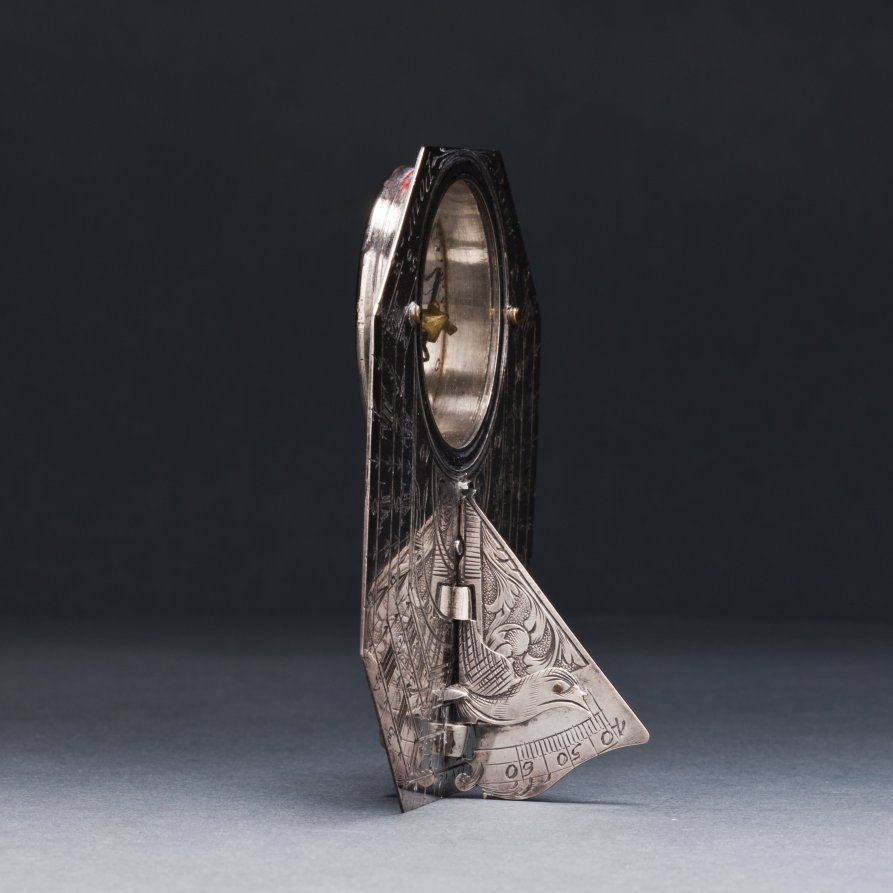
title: Butterfield Sundial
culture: France, 18th century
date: 1700s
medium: silver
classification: Silver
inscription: [Engraved signature above the compass in ribbon band]: "N. BION A Paris"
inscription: [Engraved on the face of the sundial]: “Pour 55° 4-5-6-7-8-9-10-11 50° IIII-V-VI-VII-VIII-IX-X-XI 45° 5-6-7-8-9-10-11 40° -VI-VII-VIII-IX-X-XI'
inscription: [Engraved on the other side]: "Pour 55° -8-7-6-5-4-3-2-1-0 50°-VIII-VII-VI-V-IIII-III-II-I 45°-8-7-6-5-4-3-2-1 40°-VII-VI-V-IIII-III-II-I"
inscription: [Engraved around the compass]: “NORD-OUEST-SUD-EST”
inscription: [Engraved on the back of the sundial]: “Turin 44 Milan 46 Paris 49 Lion 46 Metz 49 Rome 42 Liege 51 Naples 44 Namur 50 Gennes 44 Marseille 43 Grenoble 45 Bayonne 43 Bruxelle 51 Londres 52 Nantes 47 Vienne 48 Toulon 43 Tours 47 Lille 51”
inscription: [Engraved around the back of the compass]: “Venise 45 Strasbourg 49 Amsterdam 52 Hambourg 54 Varsovie 52 La Rochelle 46”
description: Butterfield-type sundials are characterized by their adjustable gnomons, metal flaps that cast a shadow on the dial’s face to indicate the hour, and geographical indices. This sundial has a scale adjustable between latitudes of 40° to 60° north. The latitudes of 26 European towns are engraved on its back for quick reference. With an intricately engraved silver face, it would have functioned as a fashionable traveler’s accessory.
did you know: Butterfield-style sundials were named after Micheal Butterfield, an English scientific and mathematical instrument maker who worked in Paris between 1674 and 1724.